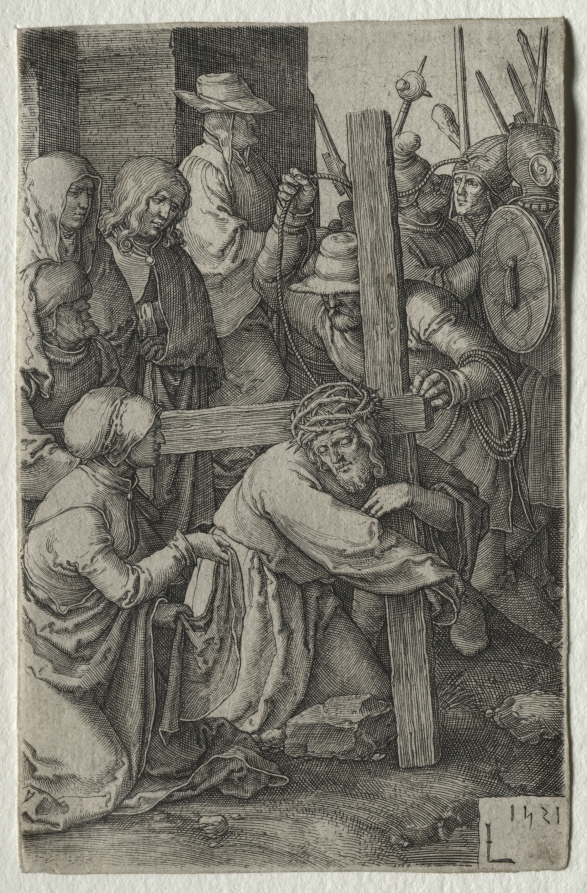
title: The Passion: Christ Carrying the Cross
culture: Netherlands, 16th century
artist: Lucas van Leyden (Netherlandish, 1494–about 1533)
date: 1521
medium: engraving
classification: Print